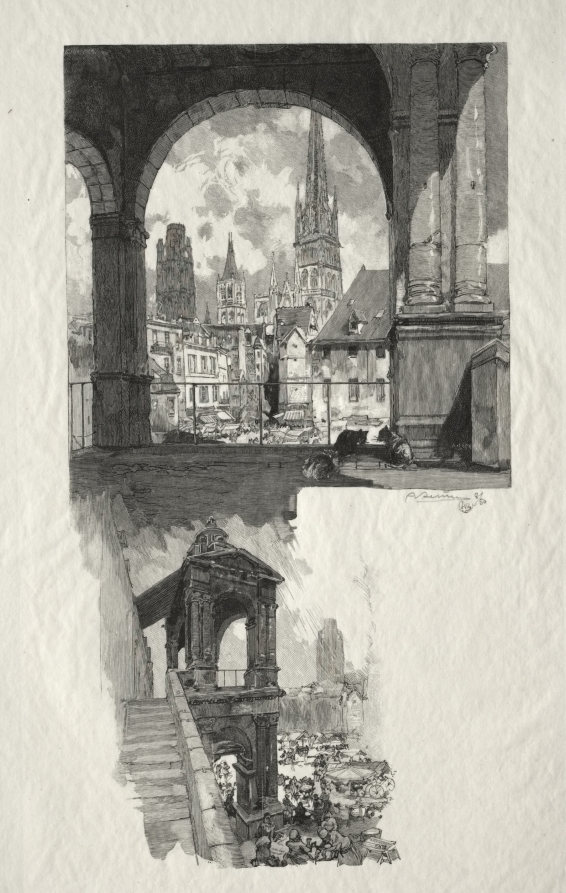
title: Place de la Haute Vieille Tour; Edicule de la Fierte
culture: France, 19th century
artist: Auguste Louis Lepère (French, 1849–1918)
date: 1896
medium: wood engraving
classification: Print